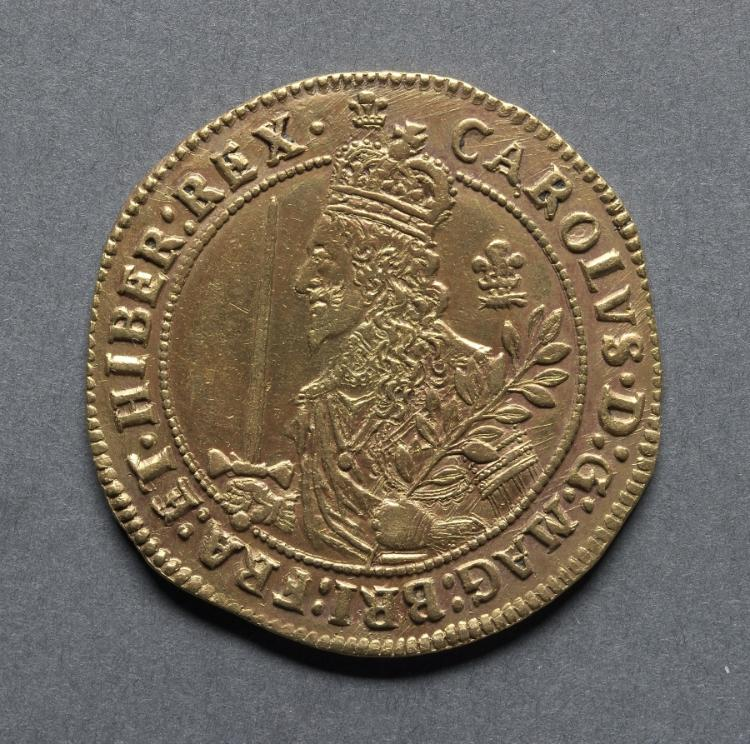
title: Triple Unite or Three Pound Piece: Charles I (obverse)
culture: England, Charles I, 1625-1649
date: 1644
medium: gold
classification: Coins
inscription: CAROLUS DG MAG BRIT FRAN ET HIBER REX